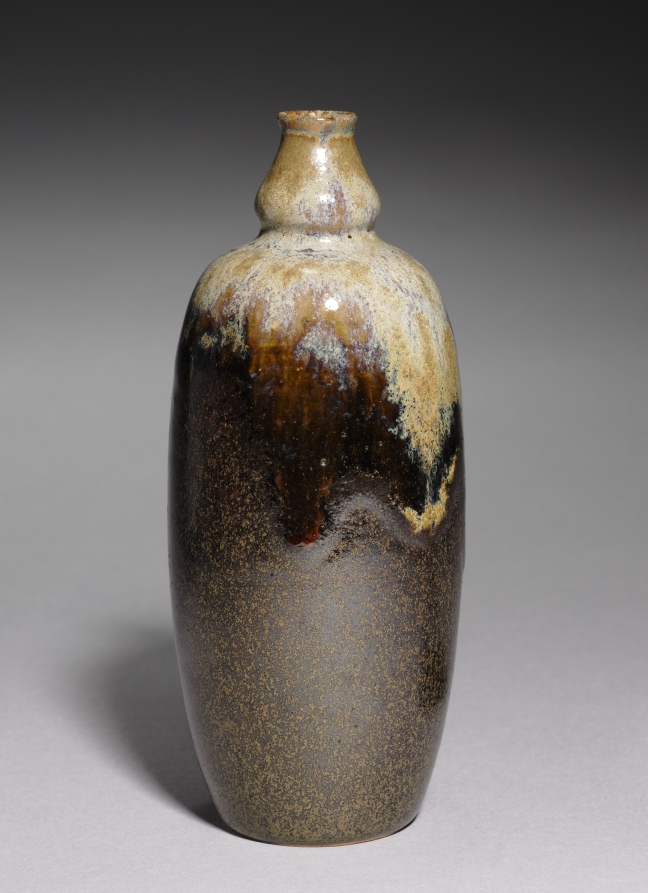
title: Vase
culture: France, early 20th Century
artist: Auguste Delaherche (French, 1857–1940)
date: c. 1910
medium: stoneware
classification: Ceramic